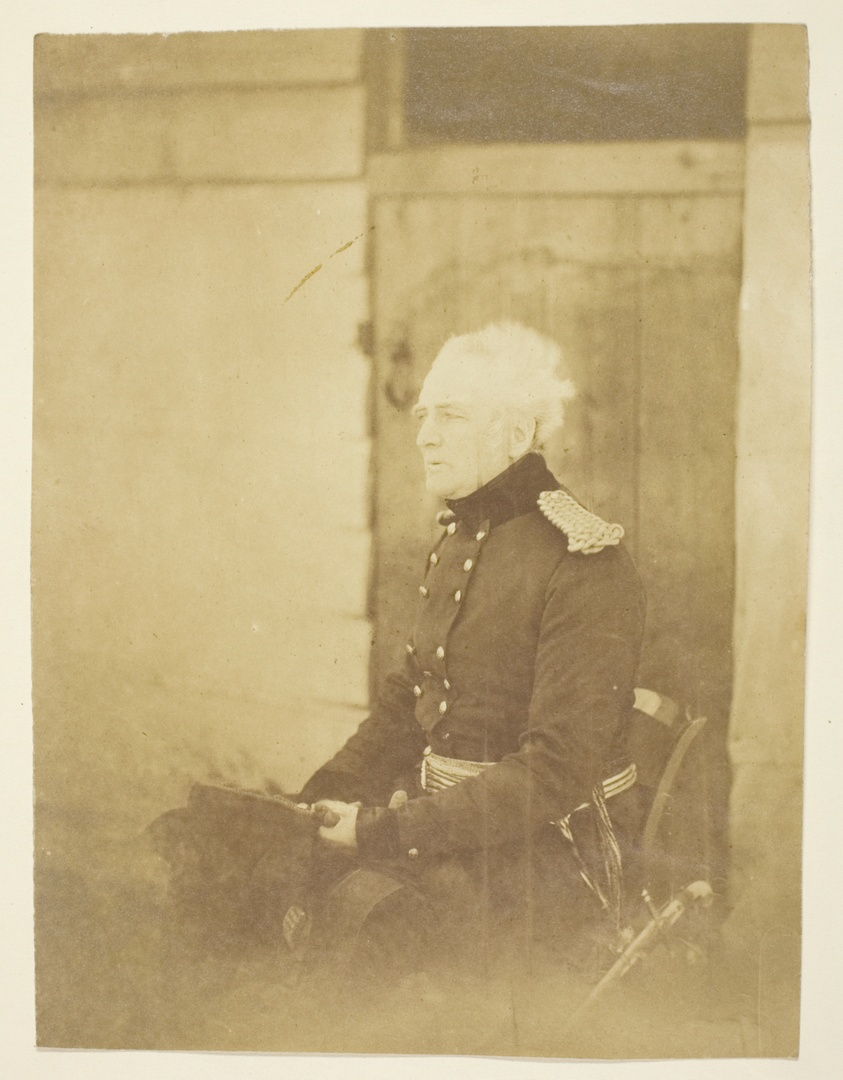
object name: Photograph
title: Sir Geo. Brown, General (1790-1865), Taken at the Crimea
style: 19th century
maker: Roger Fenton (English, 1819–1869)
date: 1855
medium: Thinly albumenized print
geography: England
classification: albumen silver print; photographic process; photography; photograph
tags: Collected by Hugh Edwards